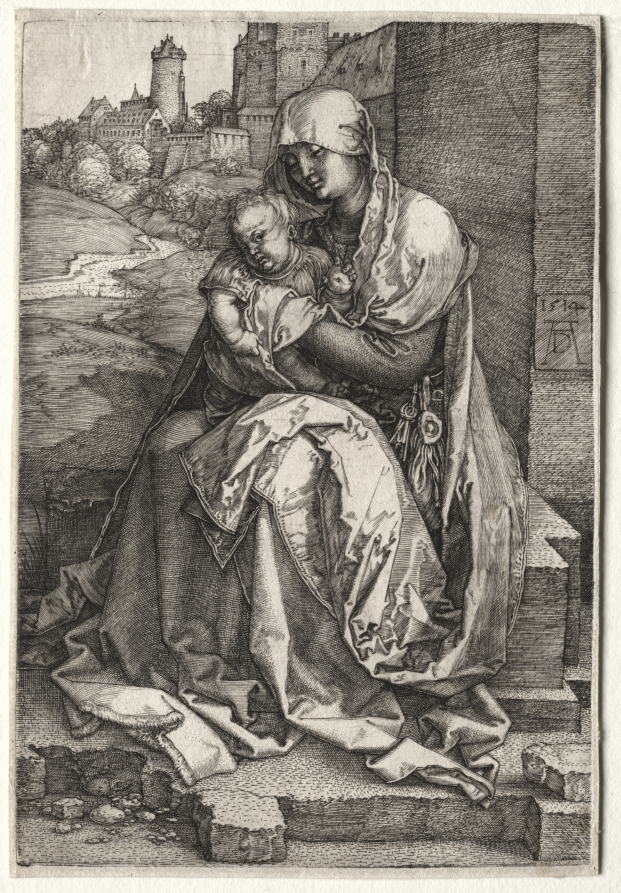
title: The Virgin and Child Seated by the Wall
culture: Germany, late 15th-early 16th century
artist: Albrecht Dürer (German, 1471–1528)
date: 1514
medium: engraving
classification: Print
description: The Virgin in this small engraving appears monumental against a contemporary view of Nuremberg castle. Although she looks regal, Dürer underscores her humanity by presenting her in this modern context and by adding commonplace household keys and a money purse at her waist. As she sits serenely, the Christ Child displays an apple to the viewer as a reminder of the past, specifically the Fall of man and his divine role in the redemption of humanity. The arrangement and introspective character of this engraving have been compared to Dürer’s Melencolia I. Both were finished in the same year as his mother’s death—a difficult time for the artist. As the third of 18 children, of which only three reached adulthood, Dürer witnessed the particular joys and heartache of motherhood.